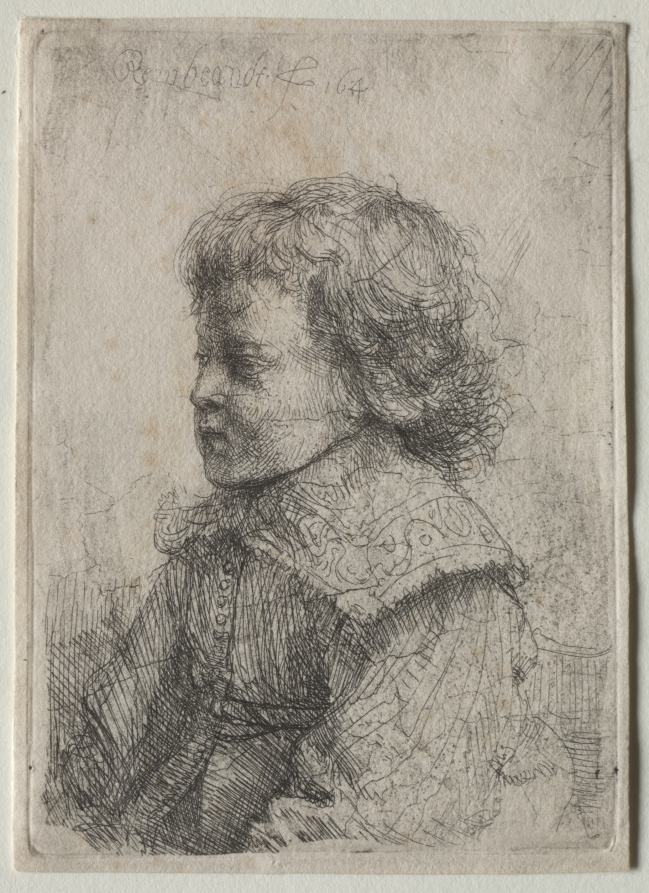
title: Portrait of a Boy in Profile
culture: Netherlands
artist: Rembrandt van Rijn (Dutch, 1606–1669)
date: 1641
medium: etching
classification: Print